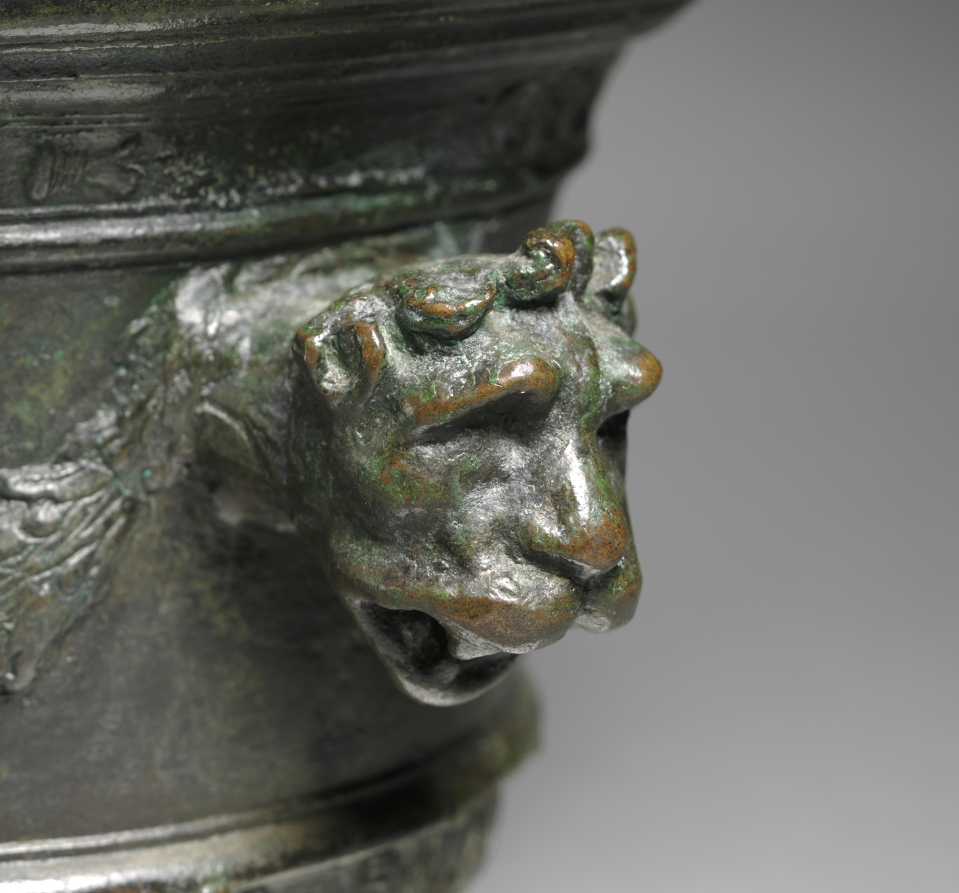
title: Mortar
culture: Italy, 18th century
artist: Georgius Mazzochus (Italian)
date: 1712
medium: bronze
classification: Sculpture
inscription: Inscription on obverse: "ANNO M D C C XII / GEORGIUS MAZZOCHUS / (fleur-de-lis)" Insciption on reverse: "FRANC I . PLAC ET PAR DUX VII / FECIT / (crowned shield with 6 fleur-de-lis)"